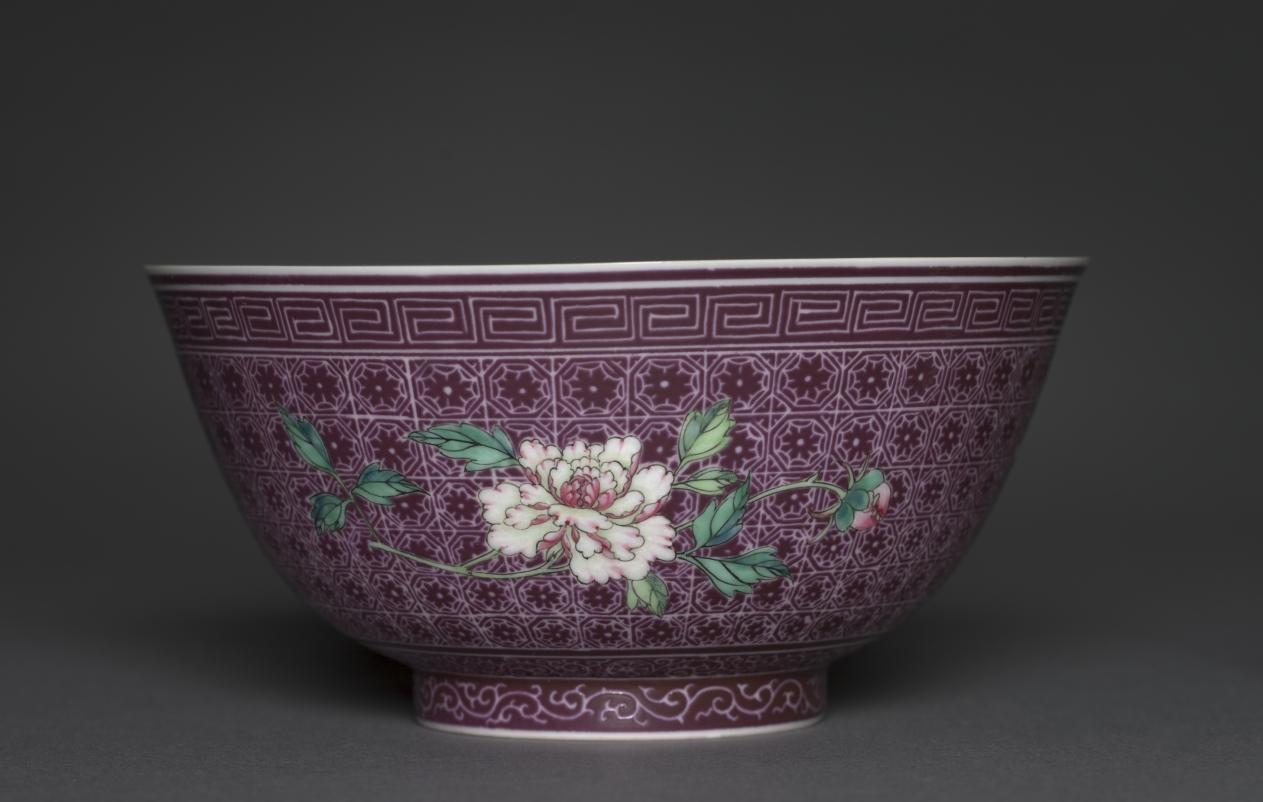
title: Bowl with Peony Sprays on Diaper Ground (exterior); Chrysanthemum Sprays (interior)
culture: China, Jiangxi Province, Jingdezhen, Qing dynasty (1644–1911), Qianlong mark and reign (1736–95)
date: 1736–95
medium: porcelain with famille rose overglaze enamel decoration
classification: Ceramic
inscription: 乾隆年製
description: The production of extraordinarily refined Qing imperial wares such as these could have involved the transportation of undecorated, plain porcelains from the imperial kilns in Jingdezhen, Jiangxi province, to the palace workshops in Beijing, where court painters applied the polychrome enamel decoration. The Qianlong reign mark on the base of the bowl is written with blue enamel over the transparent glaze.